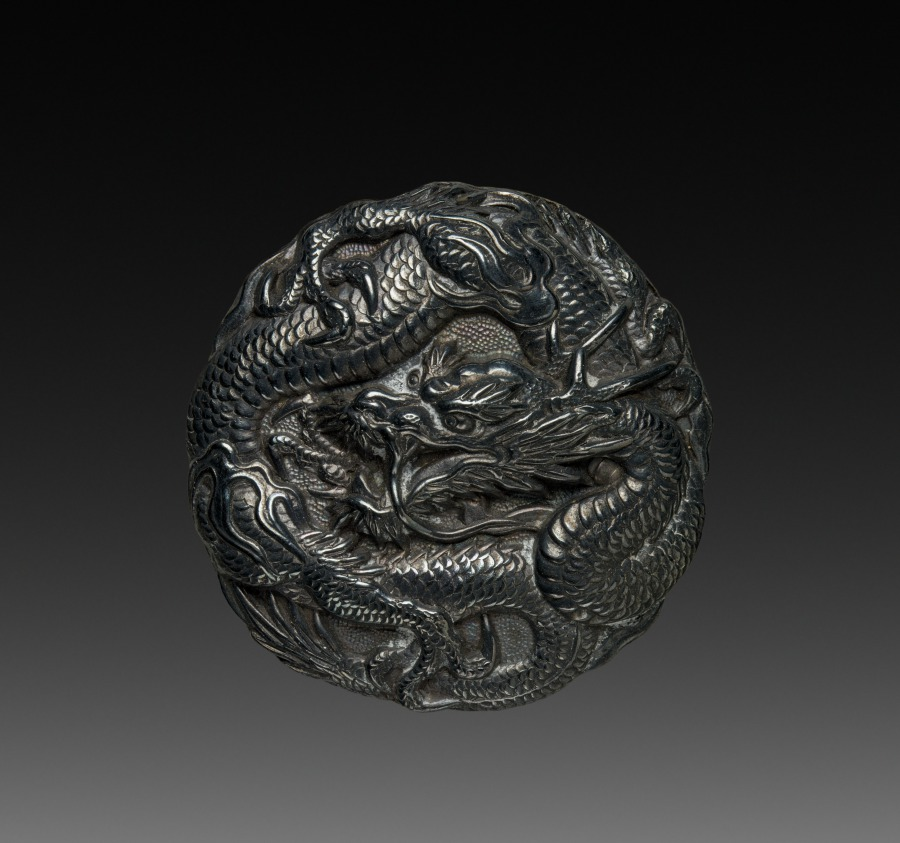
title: Button with Dragon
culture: Japan, Meiji period (1868–1912) to Taishō period (1912–26)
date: early 1900s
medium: One of a set of six buttons; cast (?) silver with relief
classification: Metalwork